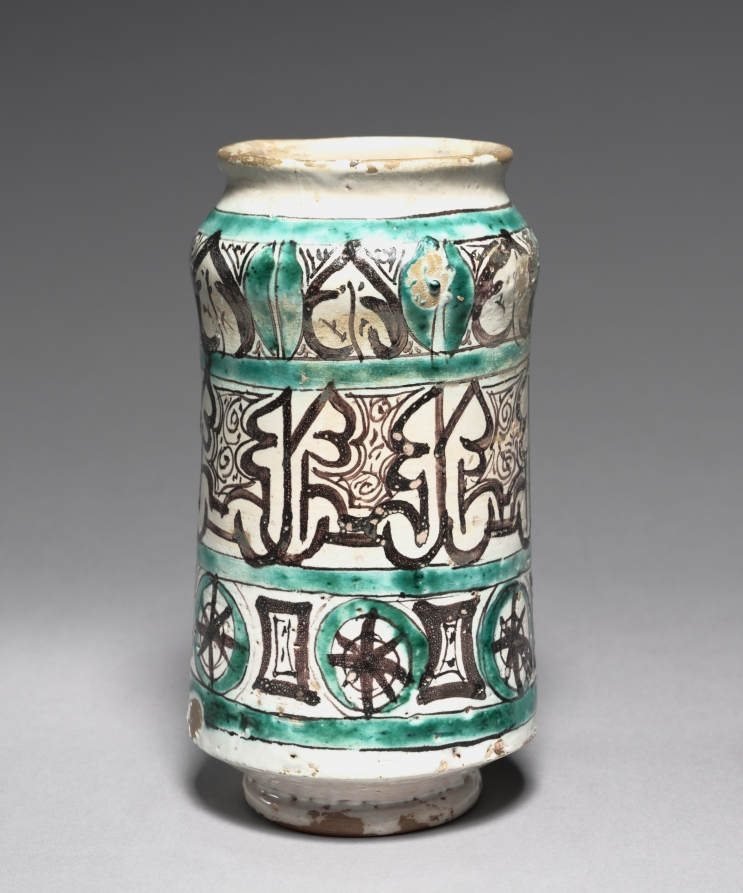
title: Albarello with Pseudo-Kufic Letters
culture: Spain, Paterna, 14th century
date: 1300s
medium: tin-glazed earthenware (maiolica)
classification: Ceramic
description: The Muslim occupation of Spain brought the arts and skills of the Islamic world to Europe and led to the flowering of ceramics throughout the continent. This vessel was made in Paterna, near the Christian port of Valencia. Its design and decoration, featuring a band of pseudo-Kufic (fake Arabic) letters, suggests a strong Muslim influence. The subtle blend of the Islamic and Spanish known as Hispano-Moresque.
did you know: Jars with this cylindrical shape were often used to store spices and herbs as well as pigments. The script on this jar doesn't help in determining its original contents; the text-like lines are completely decorative.